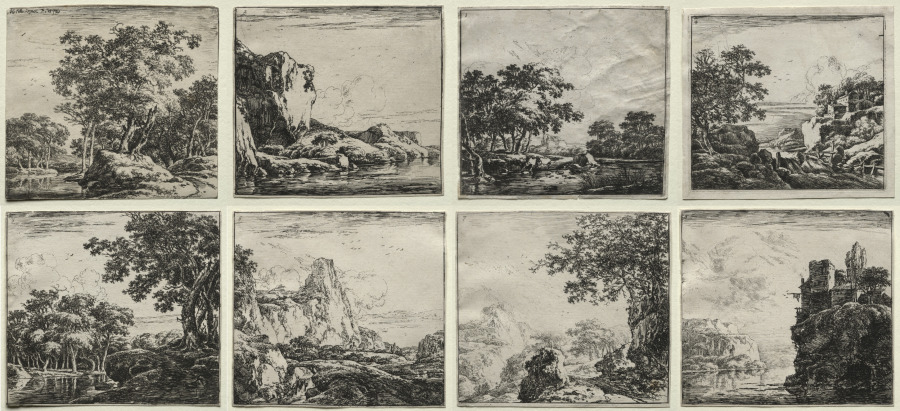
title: Etchings by Herman Naiwincx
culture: Flanders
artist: Herman Naiwincx (Flemish, c. 1624–after 1651)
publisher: Clement de Jonghe (Dutch, 1579–1679)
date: 1640–51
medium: etching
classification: Print